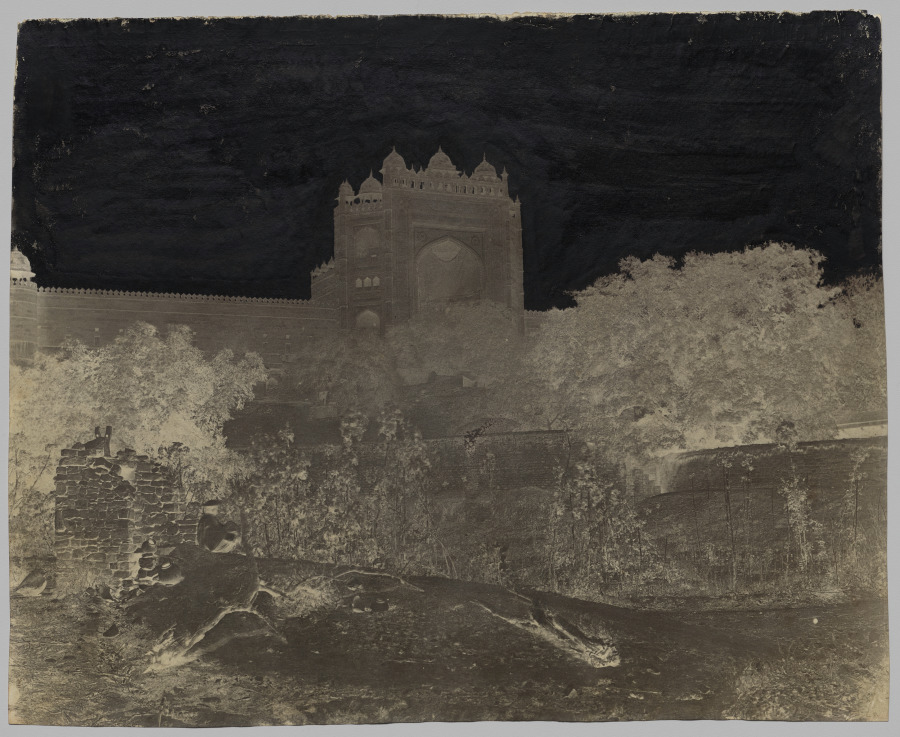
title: Buland Darwaza with Figure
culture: England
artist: Dr. John Murray (Scottish, 1809–1898)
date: 1858–62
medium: waxed paper negative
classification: Photograph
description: This gateway is the entrance to the Great Mosque at Fatehpur Sikri, not far from where John Murray was stationed for half of his four decades in India. Murray was by profession a doctor in the army of the East India Company, a British trading company that ruled much of India from 1757–1858. He took up photography in 1849 and made it his personal mission to photograph the many famous buildings in the region.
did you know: The Buland Darwaza, or “high gate,” was built in 1575 by Mughal emperor Akbar and is said to be the tallest gate in the world.